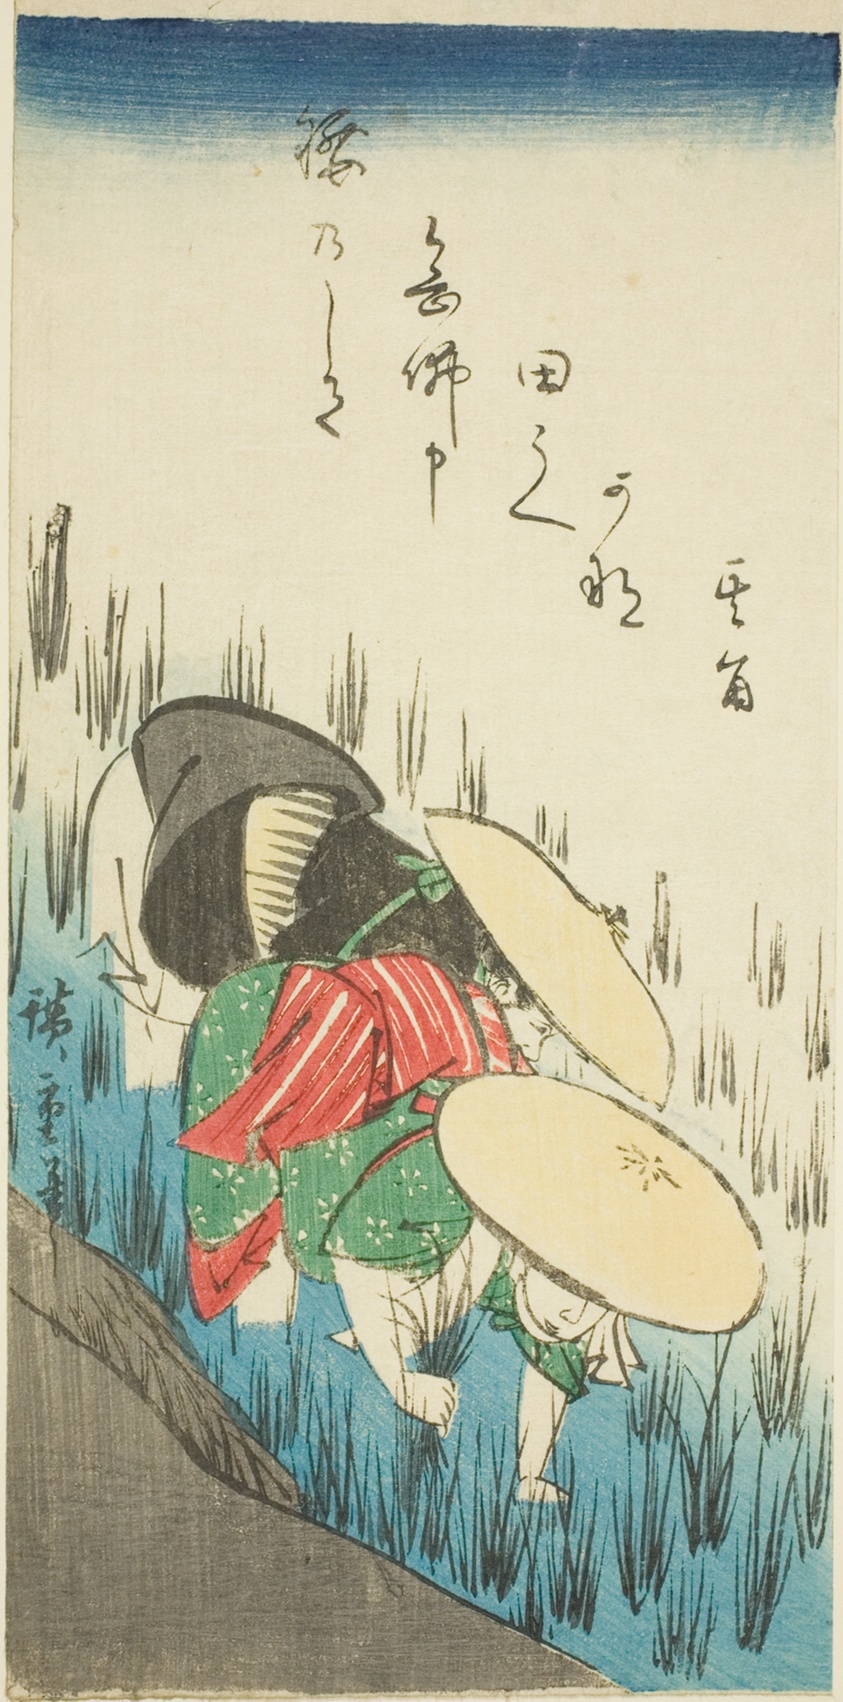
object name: Print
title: Planting rice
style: Japanese (culture or style)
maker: Utagawa Hiroshige 歌川 広重; Japanese, 1797-1858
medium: Color woodblock print; sanchogake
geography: Japan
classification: woodblock print; print; asian art